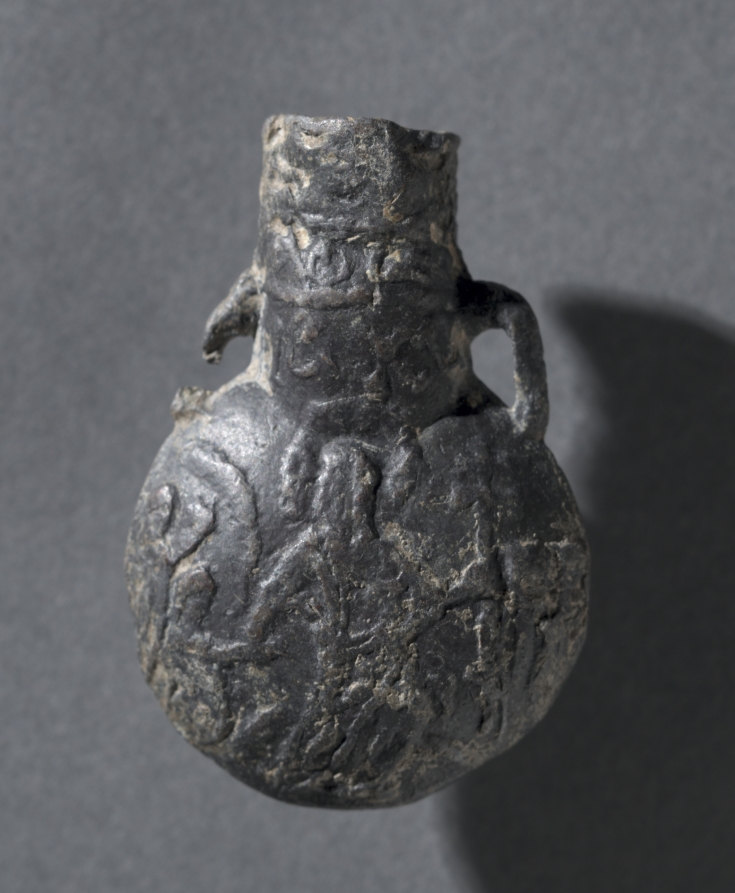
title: Pilgrim’s Flask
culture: Byzantium, Latin Kingdom of Jerusalem, Palestine, Byzantine, Crusader Period, late 11th-12th Century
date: c. 1099–1200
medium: lead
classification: Metalwork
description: After the Crusader conquest of the Holy Land in 1099, Jerusalem experienced a revival of Christian pilgrimage. During the 12th century, the Church of the Holy Sepulcher was rebuilt, redecorated, and reconsecrated. With the influx of new pilgrims, especially from Western Europe, lead ampullae (small flasks) such as this very rare example were briefly reintroduced. The flask was cast with images of the Church of the Holy Sepulcher and Christ’s Descent into Limbo (Anastasis), establishing a visual connection with the holy sites of Christ’s death and entombment.